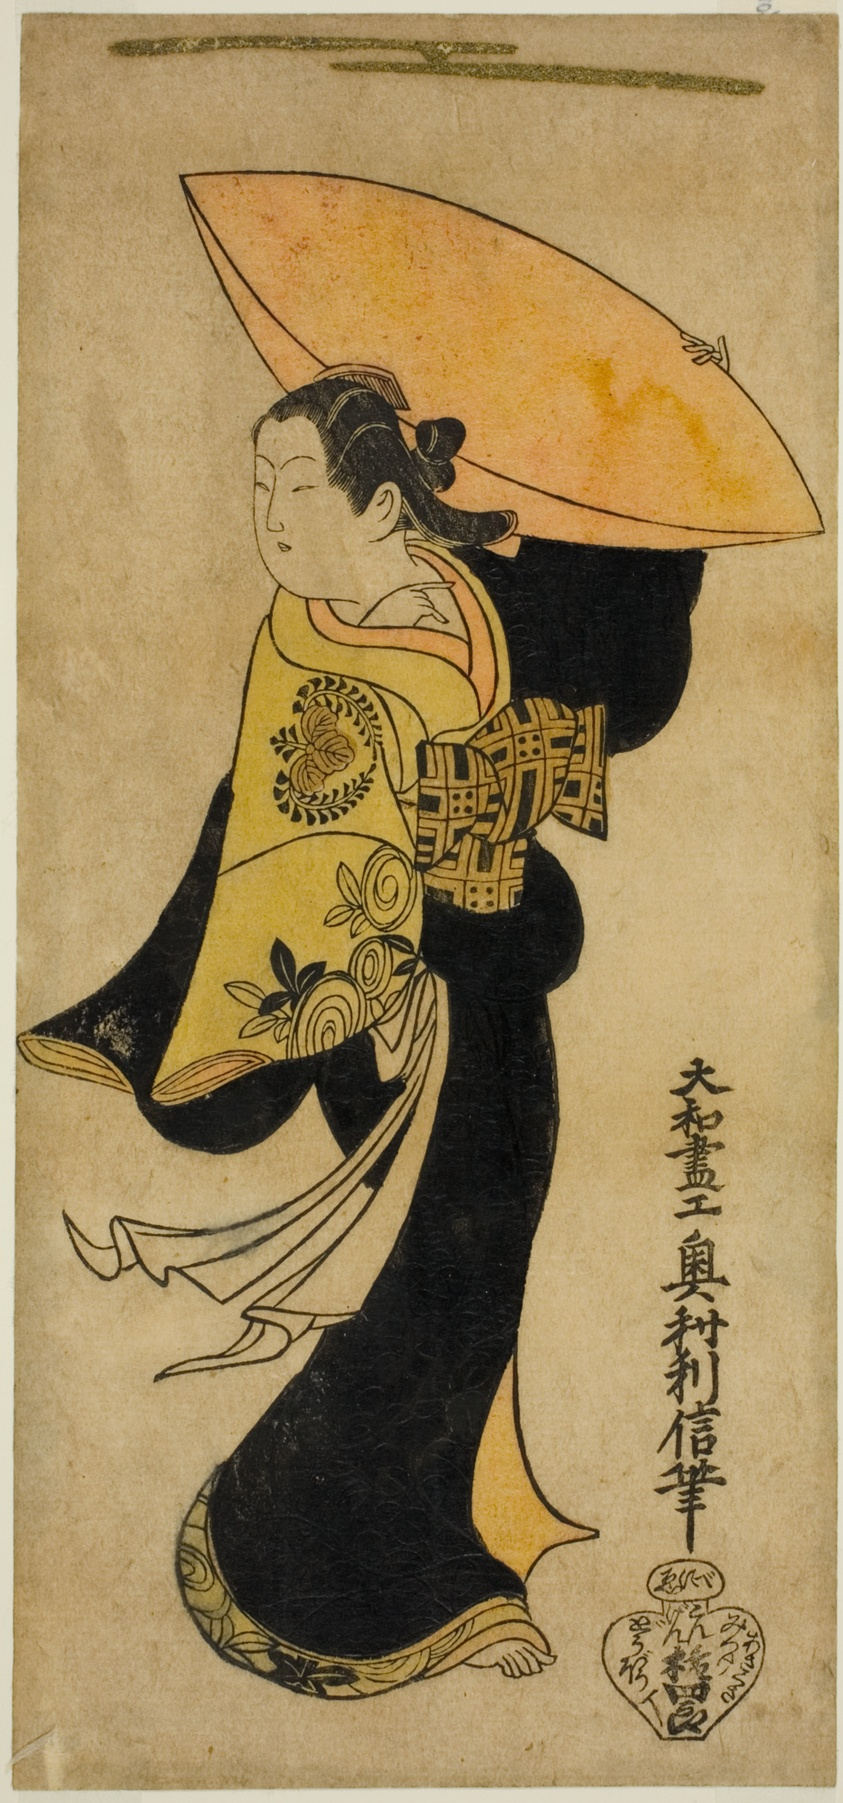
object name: Print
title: The actor Fujimura Handayu II as Nowake no Mae in the play "Tategami Teika Kazura," performed at the Ichimura Theater in the eleventh month, 1719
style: Japanese (culture or style)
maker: Okumura Toshinobu (Japanese, active c. 1717-50)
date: 1719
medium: Hand-colored woodblock print; hosoban, urushi-e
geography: Japan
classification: woodblock print; print; asian art